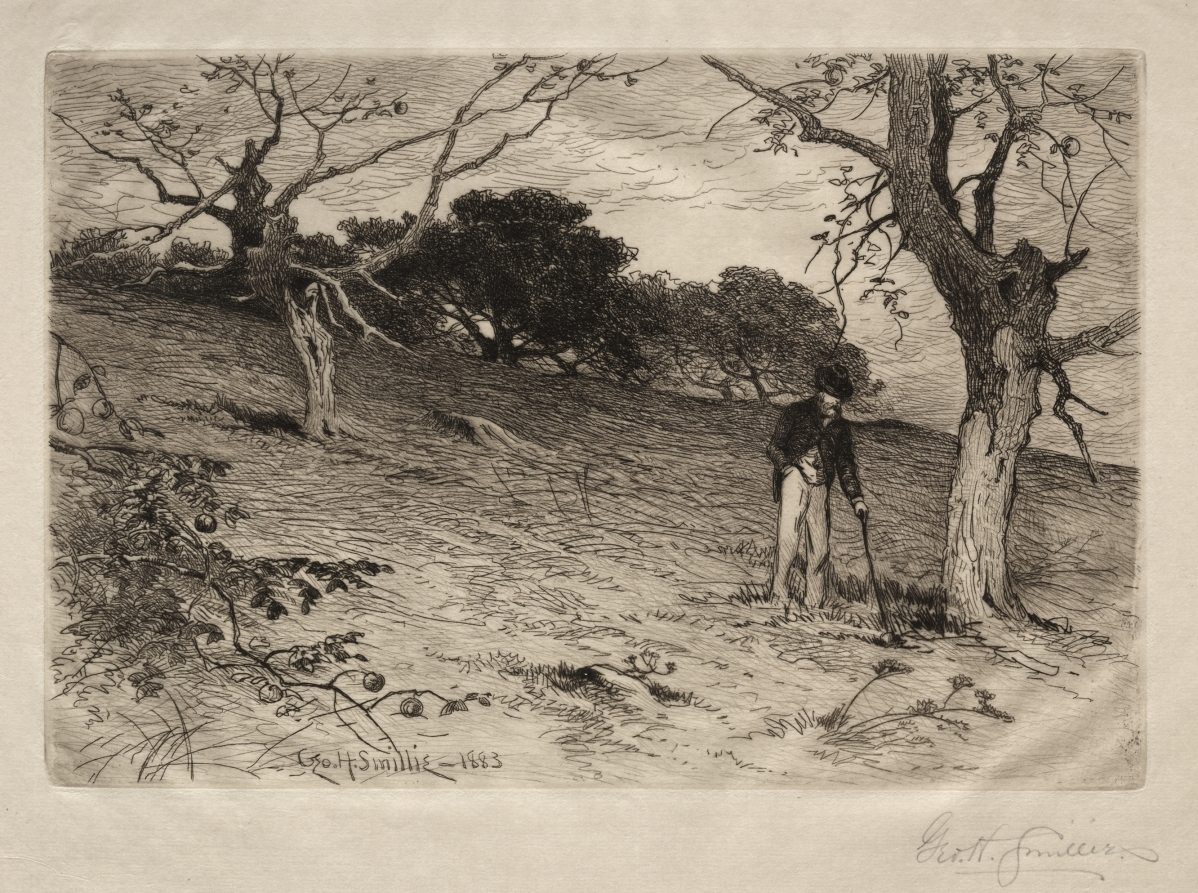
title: An Old New England Orchard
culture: America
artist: George Henry Smillie (American, 1840–1921)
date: 1883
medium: etching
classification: Print